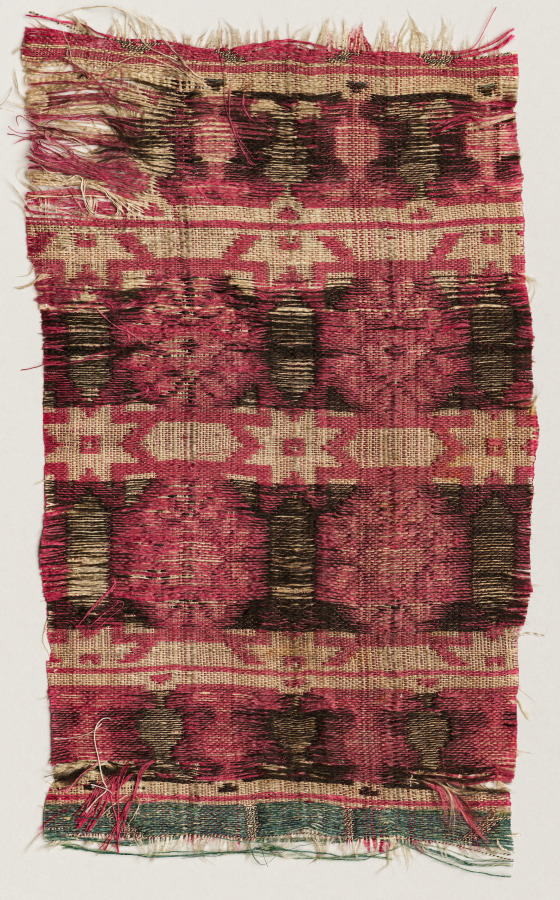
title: Fragment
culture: Africa, North Africa, Morocco, Moroccan weaver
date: 1800s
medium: Silk, metal, dye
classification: Textile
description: This woven fragment features a pattern of eight-pointed stars in various configurations, bordered by alternating black and red vegetal forms. Its fragmentary nature makes it difficult to assess what its original size, or function may have been.